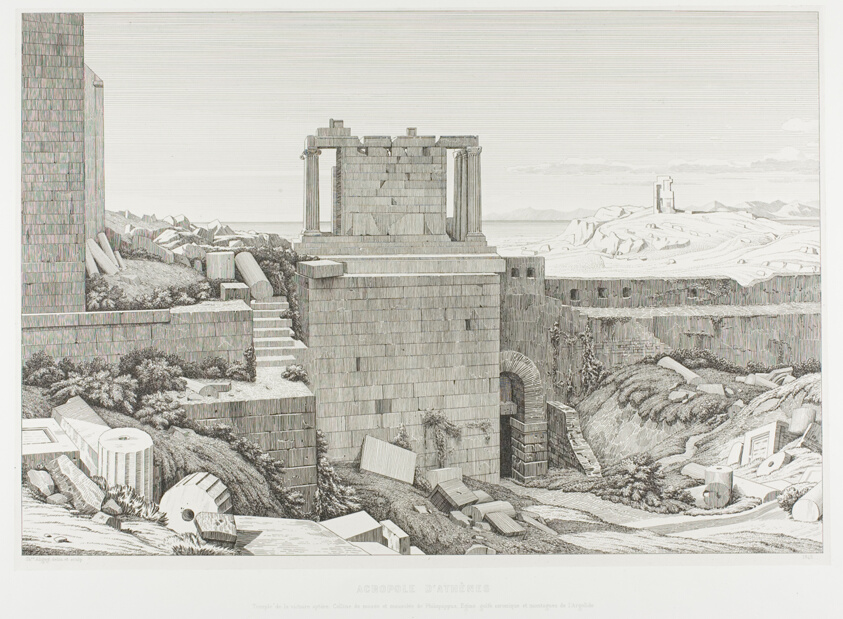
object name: Print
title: The Acropolis of Athens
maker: Théodore Caruelle d'Aligny; French, 1798-1871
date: 1845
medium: Etching on ivory China paper, laid down on white wove paper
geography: France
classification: etching; print; prints and drawing